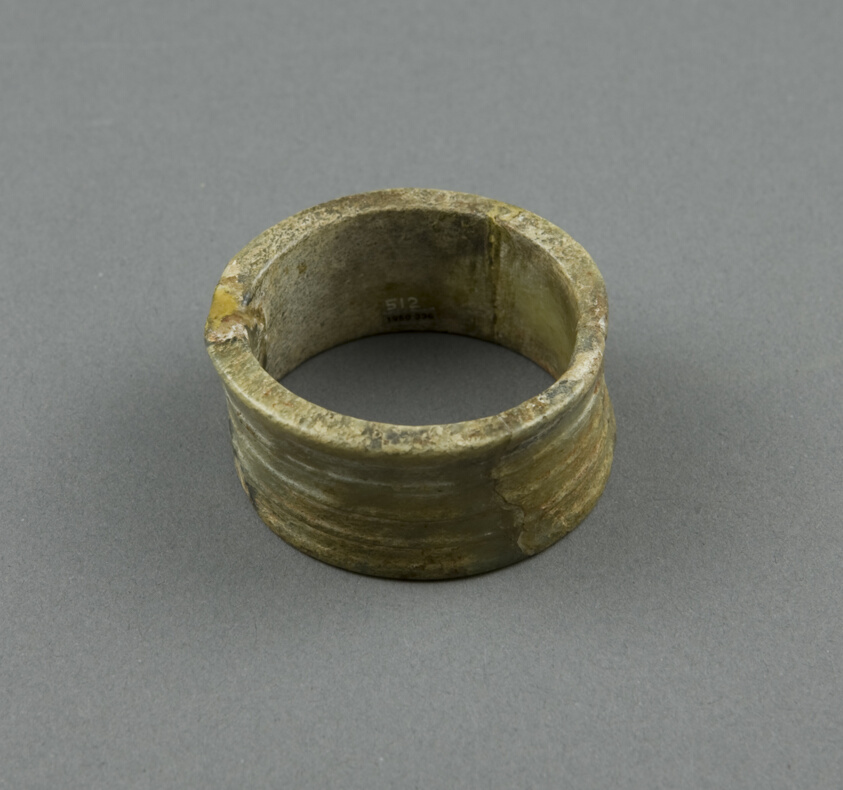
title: Ring with raised lines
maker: China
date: Shang dynasty (c.1600–1050 BC)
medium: Jade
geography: China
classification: jade; asian art